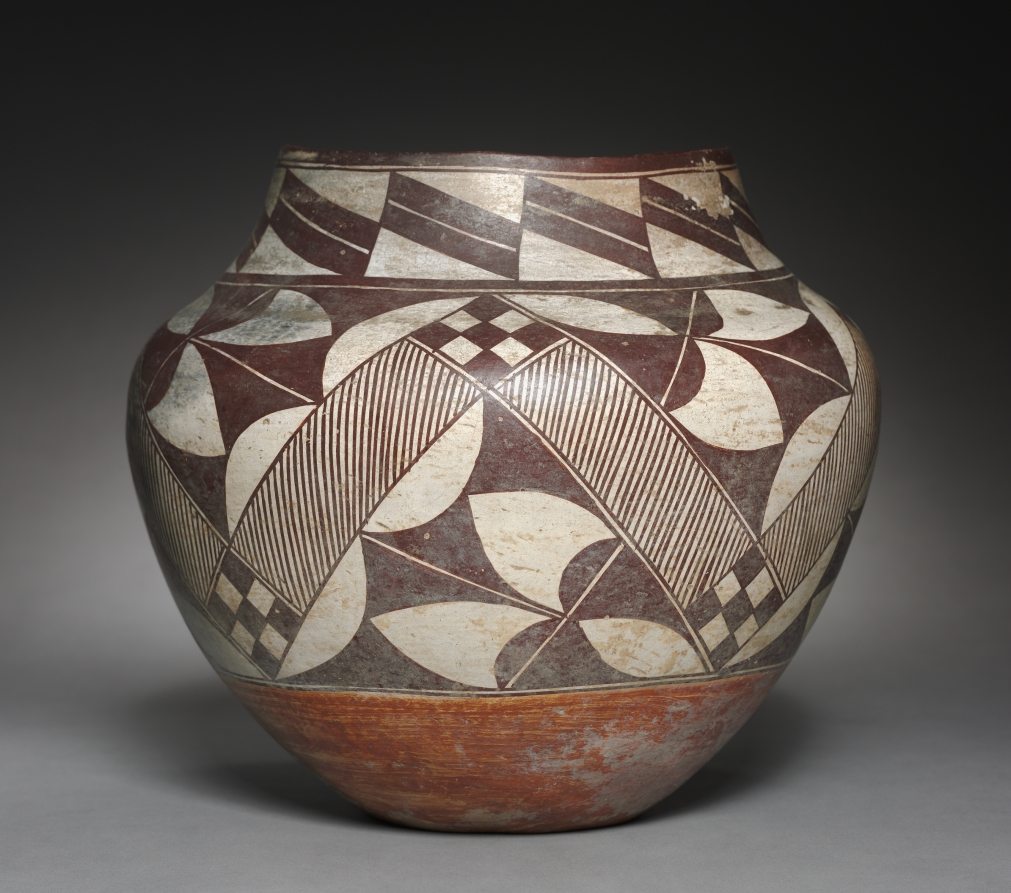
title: Water Jar (Olla)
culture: Native North America, Southwest, New Mexico, Acoma Pueblo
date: 1880s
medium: ceramic, slip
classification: Ceramic